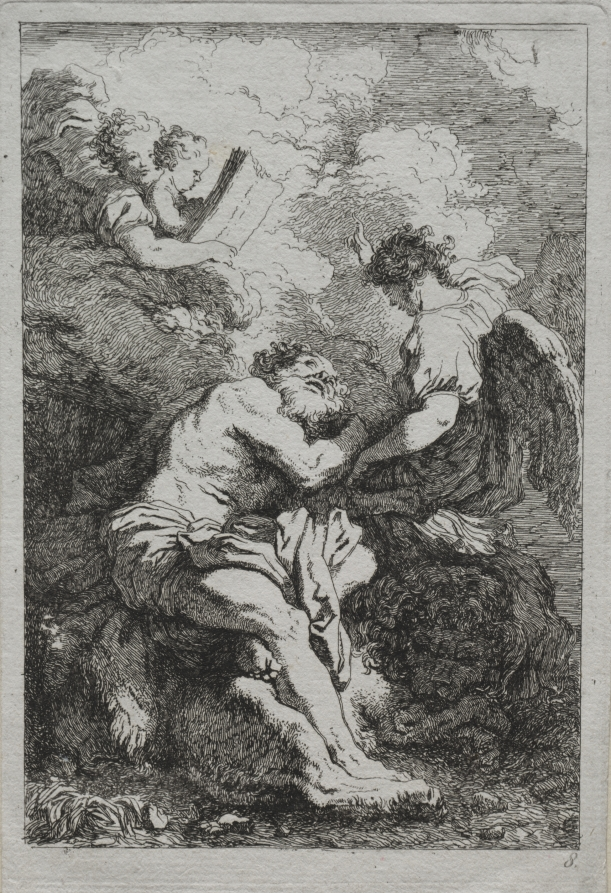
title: Saint Jerome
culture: France, 18th century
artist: Jean-Honoré Fragonard (French, 1732–1806)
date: 1761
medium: etching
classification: Print